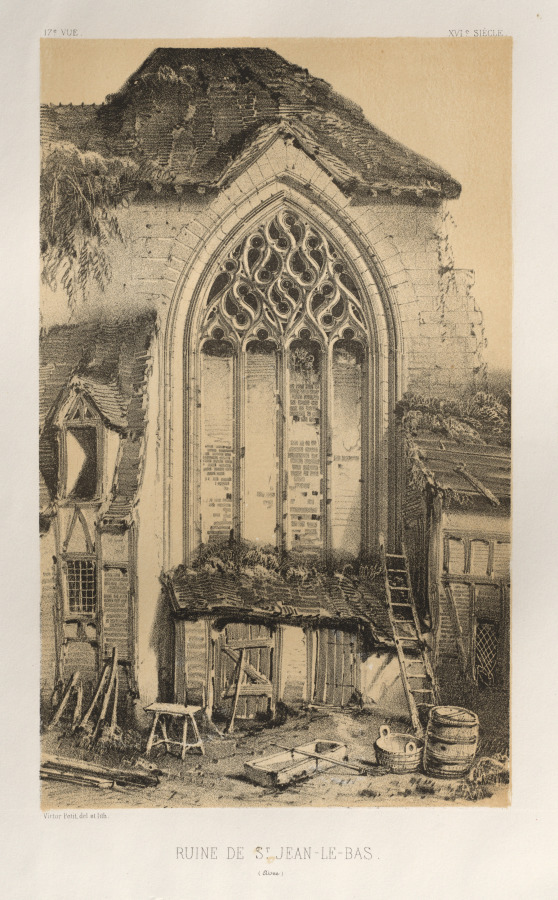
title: Architecture Pittoresque ou Monuments des xveme. Et xvieme. Siecles: Chateaux De France des XV et XVI Siecles: Pl.17, Ruine De St. Jean-Le-Bas (Aisne)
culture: France, 19th century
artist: Victor Petit (French, 1817–1874)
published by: Charles Boivin (publisher and editor); Lith de Godard a Paris (printer)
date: 1860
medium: lithograph with tint stone, from portfolio of 100 lithographs with tint stone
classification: Print